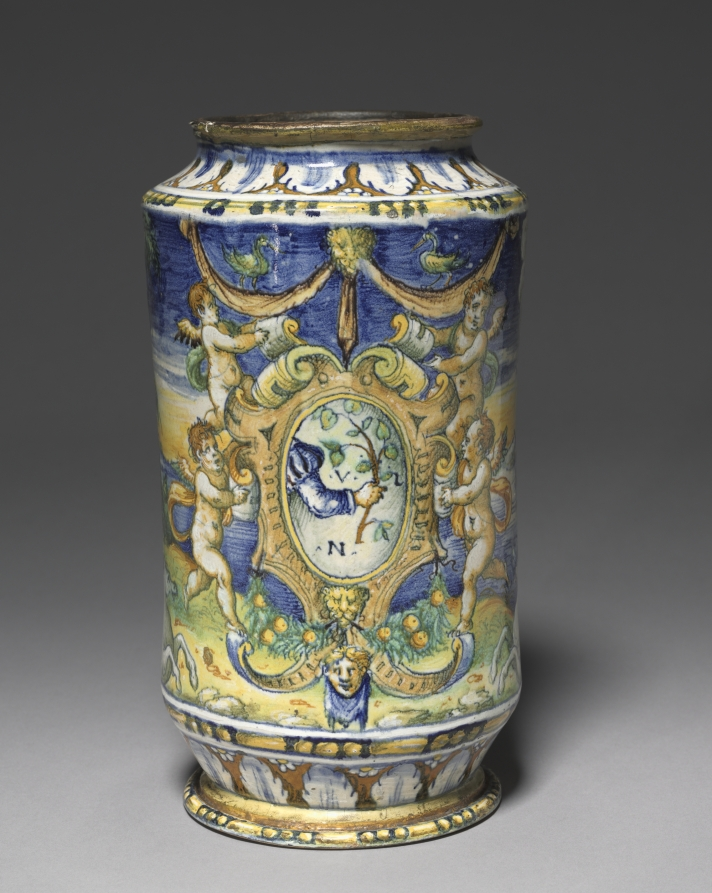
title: Pharmacy Jar (Albarello)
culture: Italy, Venice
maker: circle of Domenego da Venezia (Italian)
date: c. 1550–70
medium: tin-glazed earthenware (maiolica)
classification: Ceramic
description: Depictions of ancient myths were a popular subject for ceramic decoration during the Renaissance. This pharmacy jar features the myth of Perseus and Andromeda. According to Greek mythology, a sea monster was sent to destroy the kingdom of Ethiopia after Queen Cassiopeia offended the sea nymphs. To appease the gods, Andromeda was chained to a rock and offered as a sacrifice to the monster. Before the creature could devour her, Perseus flew in on his winged horse and slayed the beast.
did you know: Featuring a fashionably clad gentleman’s torso, this pharmacy jar displays the coat of arms of the Hercolani family, who made their fortune dealing in textiles for men’s clothing.